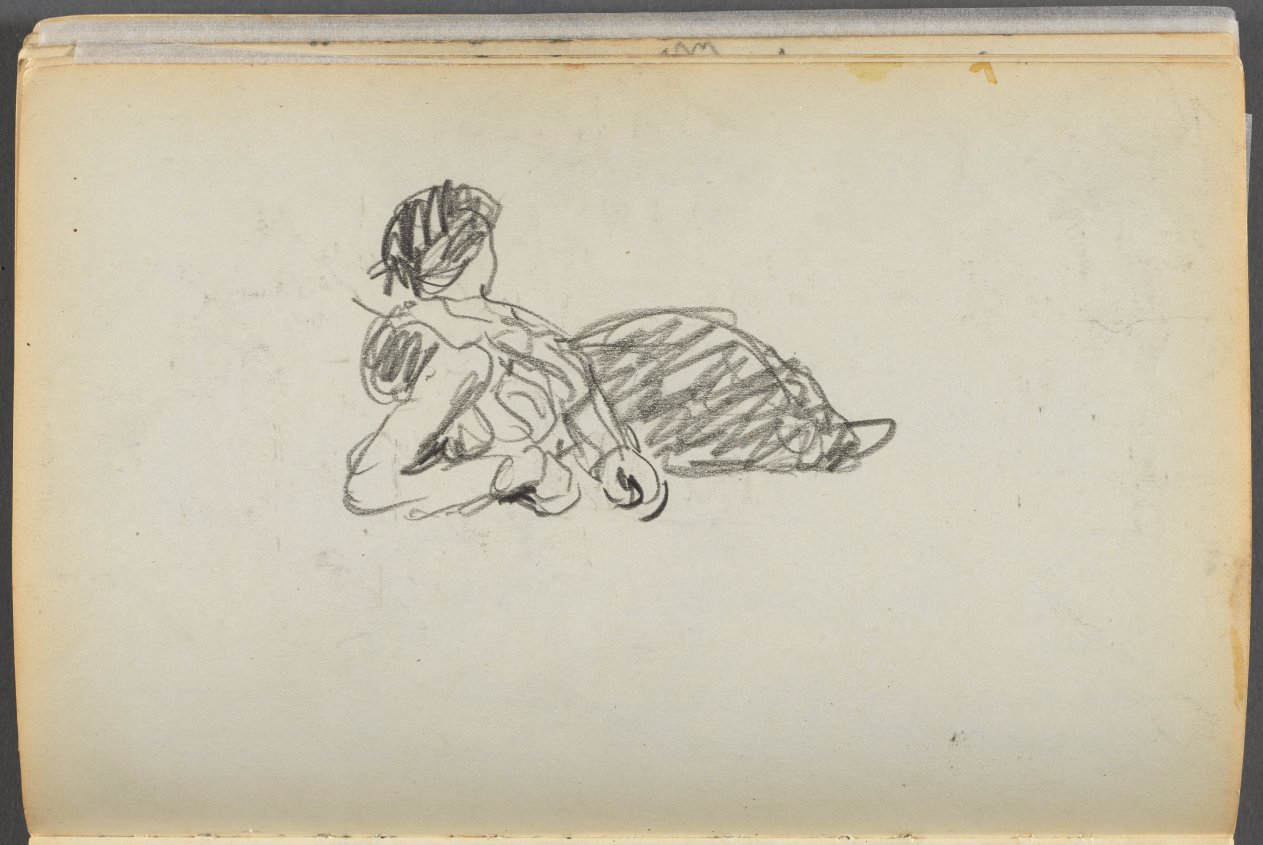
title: Sketchbook- The Granite Shore Hotel, Rockport, page 082: Reclining Figure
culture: America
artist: Maurice Prendergast (American, born Newfoundland [now Canada], 1858–1924)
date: 1905–10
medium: graphite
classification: Bound Volume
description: This sketchbook contains 72 pages of pencil drawings and 9 watercolors of Cape Ann. On the inside of the cover Prendergast wrote the address of the Granite Shore Hotel in Rockport, Massachusetts.